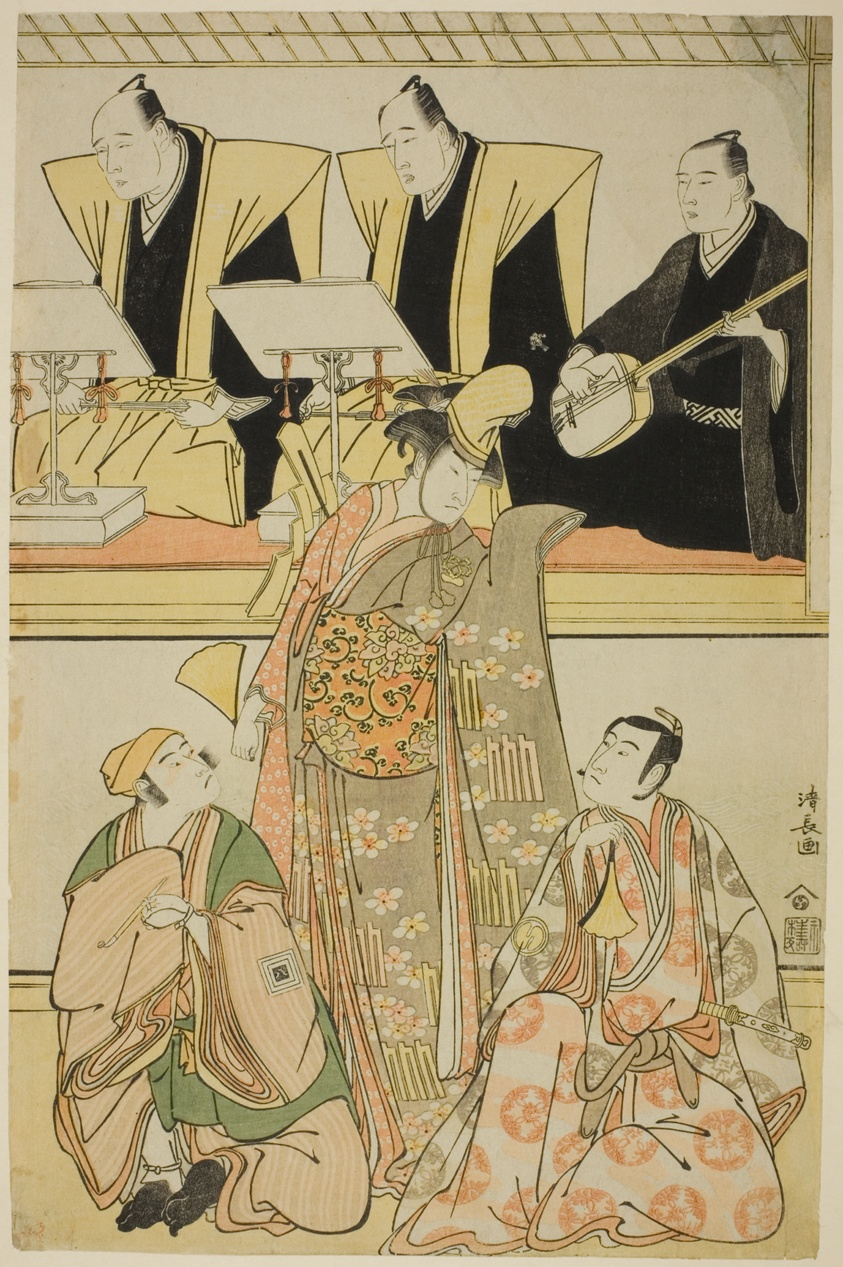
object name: Print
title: The Actors Nakayama Kojuro VI (Nakamura Nakazo I) as Chidori, Sawamura Sojuro III as Shigemori, and Ichikawa Yaozo III as Yoshibei, in the shosa "Fukyoku Edo Geisha," performed at the Nakamura Theater in the eleventh month, 1785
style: Japanese (culture or style)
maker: Torii Kiyonaga (Japanese, 1752-1815)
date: 1785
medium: Color woodblock print; oban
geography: Japan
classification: woodblock print; print; asian art